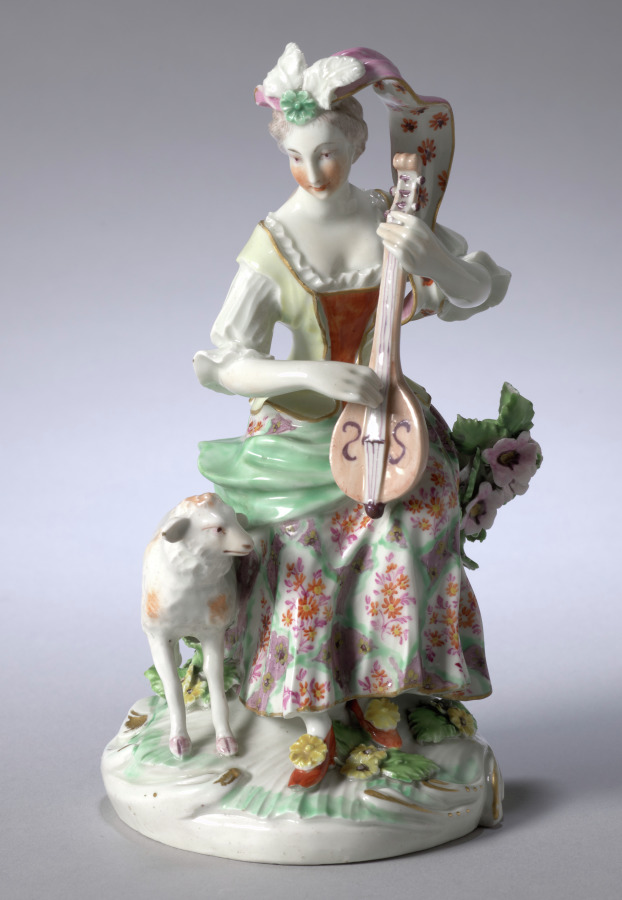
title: Seated Musician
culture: England, Derby, 18th century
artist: Derby Porcelain Factory (British)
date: c. 1765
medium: soft-paste porcelain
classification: Ceramic